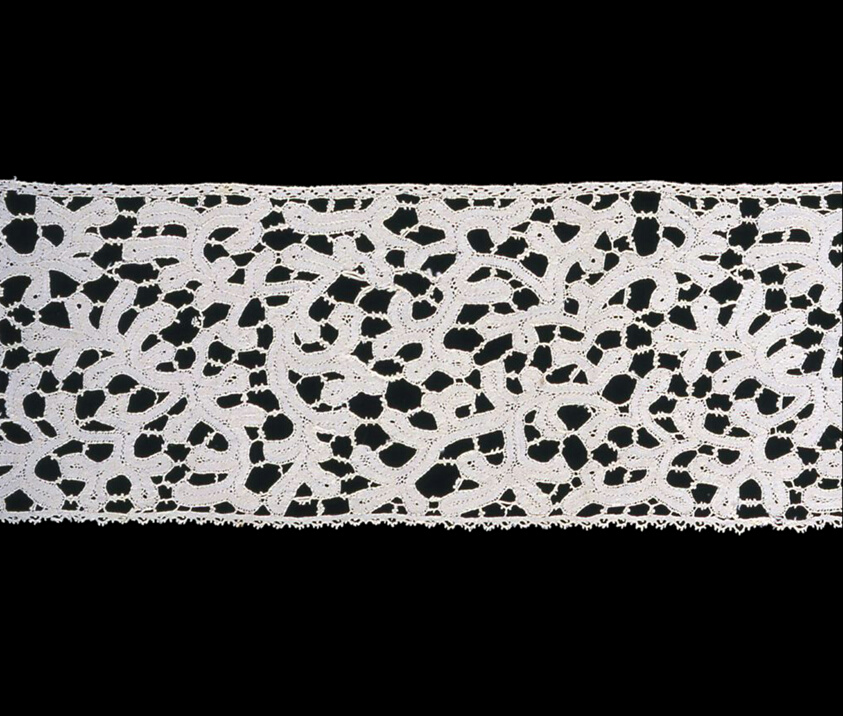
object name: Textile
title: Border (Furnishing)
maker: Northern Italy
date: 1701/50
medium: Linen, bobbin part lace (continuous clothwork tapes)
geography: Italy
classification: textile; lace - bobbin